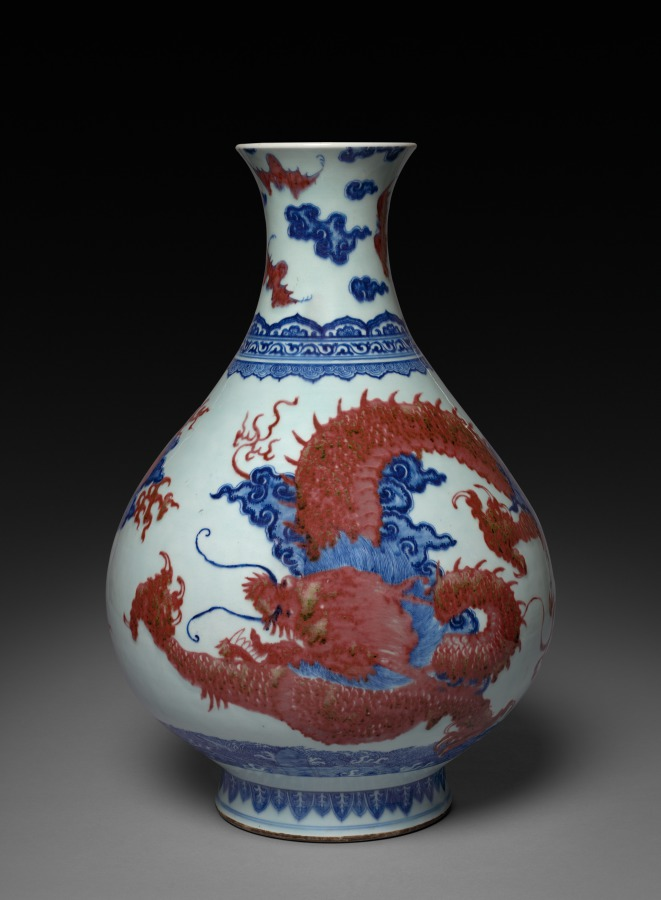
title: Vase with Dragon and Cloud Decoration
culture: China, Qing dynasty (1644-1911), Yongzheng reign (1723-35)–Qianlong reign (1736-95)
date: mid- to late 1700s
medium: porcelain with underglaze blue and red decoration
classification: Ceramic